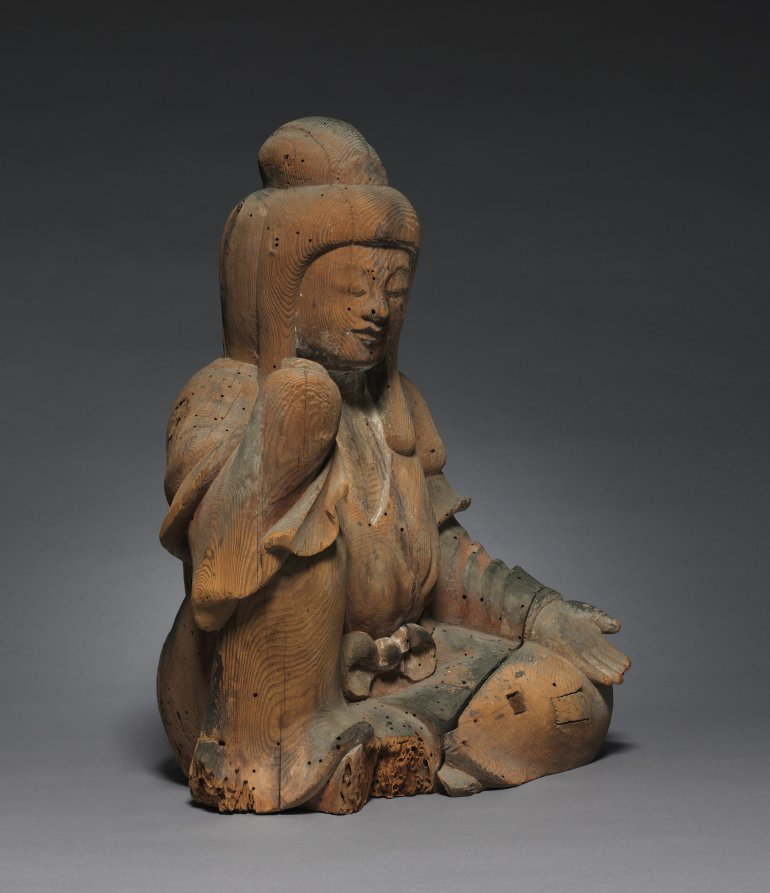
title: Shinto Deity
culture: Japan, Heian period (794–1185)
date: 900s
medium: wood, with traces of polychromy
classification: Sculpture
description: This sculpture represents a kami, the name for deities associated with the Japanese religious tradition called Shinto. It is said to have originally been created for the Usa Hachiman Shrine in Oita on the island of Kyushu. The shrine houses four main kami: Hime Okami, who assists those engaged in agriculture andsea travel; the legendary 5th-century emperor Ojin deified as the kami Hachiman; Empress Jingu; and the kami of Mount Kawara, who aids copper miners. The pose of this figure, dressed in robes reminiscent of a Tang dynasty court lady, suggests that she may have been an attending deity.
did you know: Traces of pigment on the surface of this sculpture indicate it was once painted.